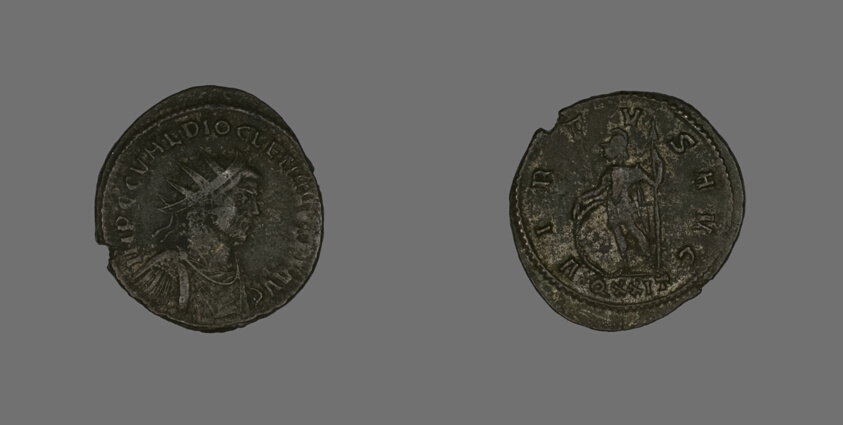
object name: Coin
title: Antoninianus (Coin) Portraying Emperor Diocletian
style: roman (ancient, style or period), ancient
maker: Roman; minted in Ticinum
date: about 285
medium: Billon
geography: Roman Empire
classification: coin; ancient art